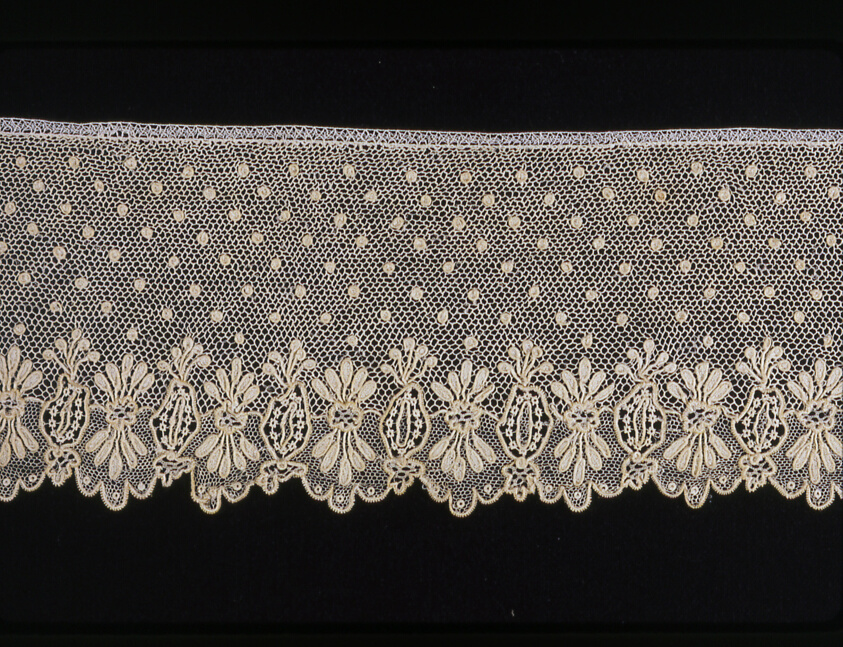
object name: Textile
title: Border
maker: France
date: 1800/25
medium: Linen and horsehair, needle lace of a type known as "Point d'Argentan" with a whipped mesh ground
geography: France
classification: textile; lace - needle